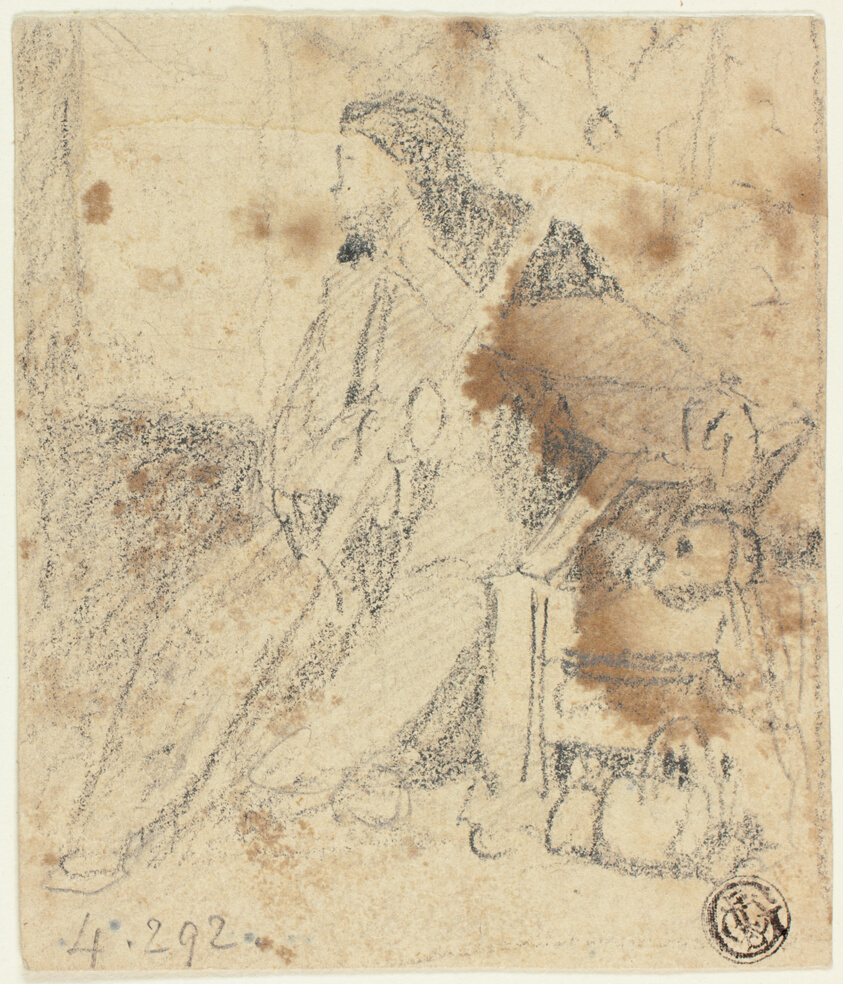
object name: Drawing and Watercolor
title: Sketch of Actor Sitting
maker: John Sell Cotman (English, 1782-1842)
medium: Graphite on tan wove paper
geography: England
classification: graphite; drawings (visual works); prints and drawing